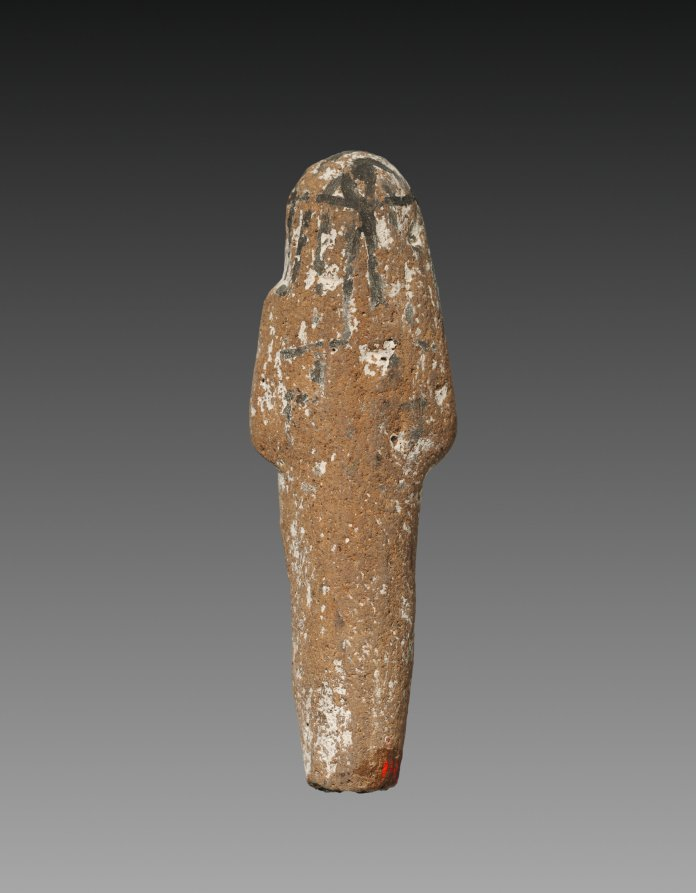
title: Shawabty of Padiamen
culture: Egypt, Third Intermediate (1069–715 BCE), Dynasty 21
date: 1025–975 BCE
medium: painted terracotta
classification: Funerary Equipment